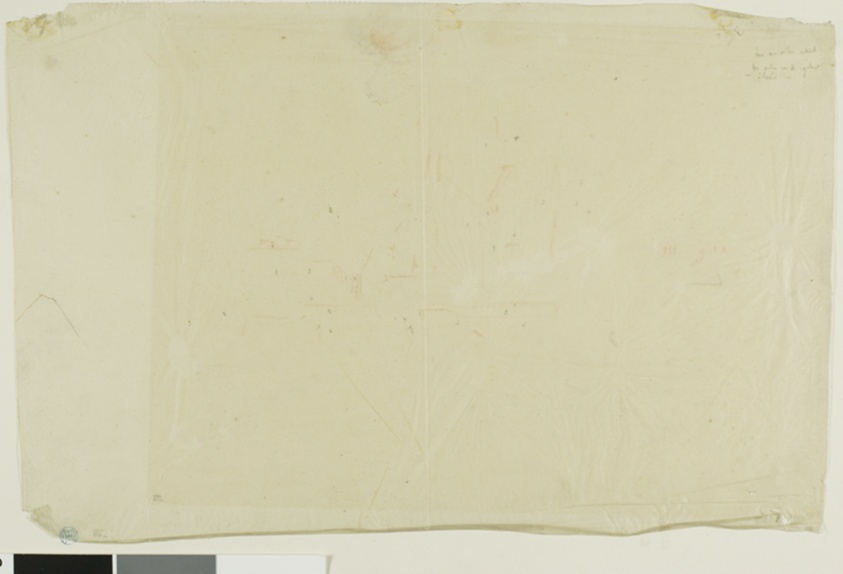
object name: Drawing and Watercolor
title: Diagrammatic sketch of building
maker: Charles Meryon (French, 1821-1868)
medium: Red Conté crayon with graphite on cream wove tracing paper (discolored to tan), tipped on cream wove card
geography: France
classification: graphite; drawings (visual works); prints and drawing